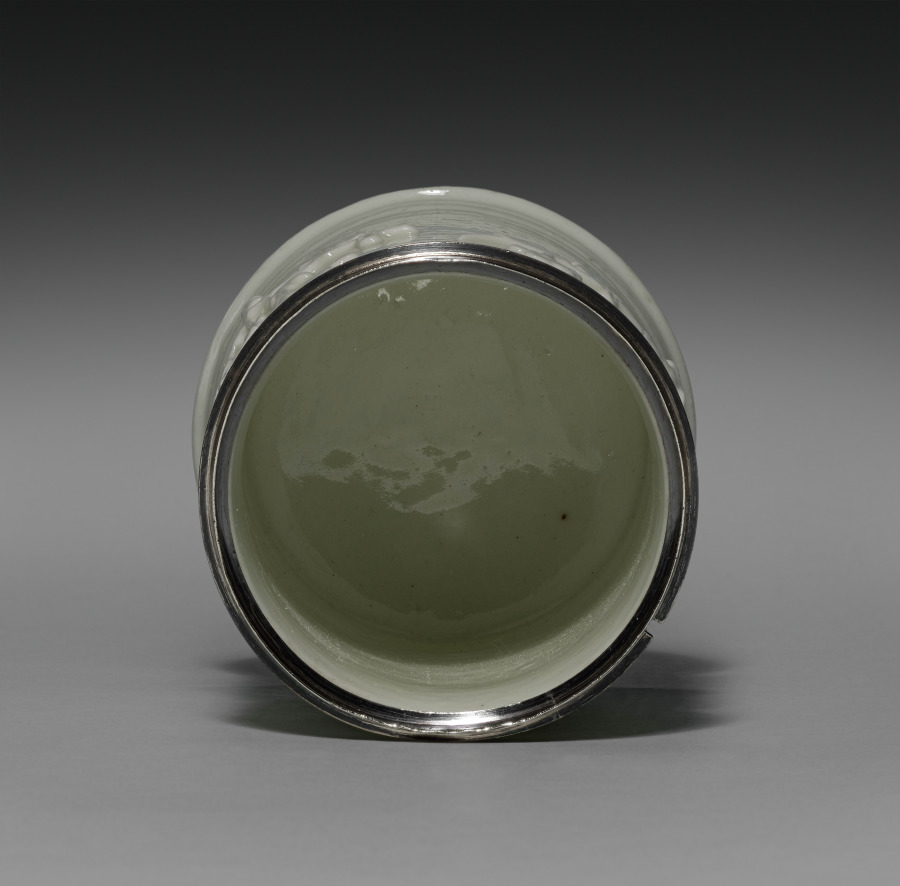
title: Sugar Caster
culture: France, Saint Cloud, 18th century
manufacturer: Saint Cloud Porcelain Factory (French)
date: c. 1732– 1738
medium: soft-paste porcelain, silver mount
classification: Ceramic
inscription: [Discharge mark of Hubert Louvet, 1732-1738 (Dog's head in profile), on both sections of silver mount]